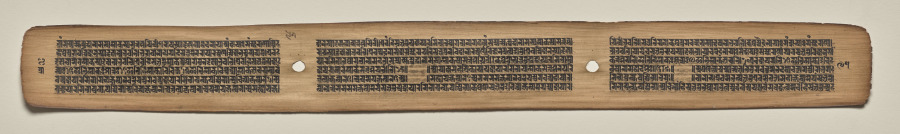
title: Text, Folio 97 (verso), from a Manuscript of the Perfection of Wisdom in Eight Thousand Lines (Ashtasahasrika Prajnaparamita-sutra)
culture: Eastern India, Bihar, Vikramashila Monastery. Painting: Nepal, Kathmandu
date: Sunday, September 14, 1119 (year 239 of the Newar Samvat in the month of Ashvina)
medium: gum tempera and ink on palm leaves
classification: Painting